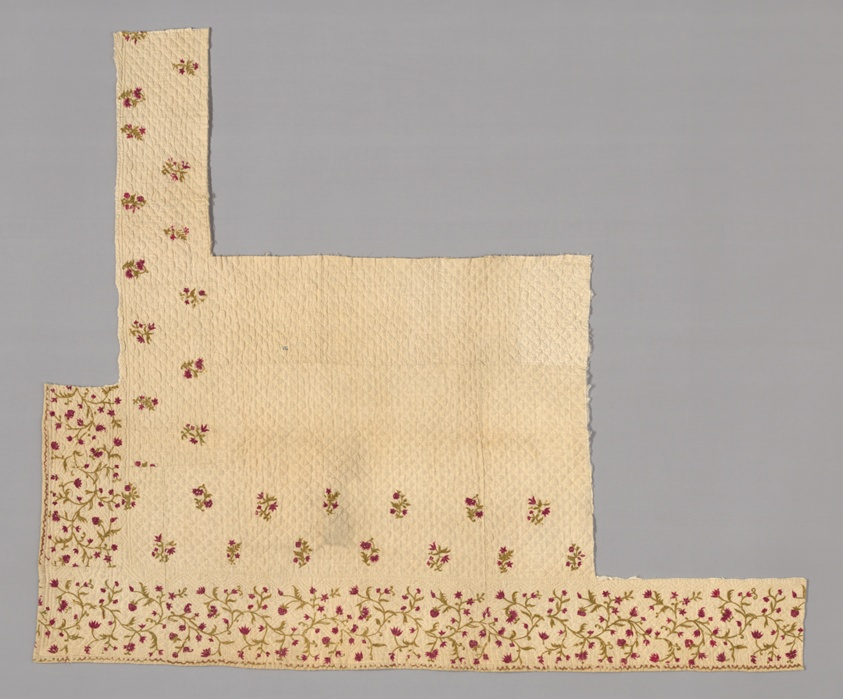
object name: Textile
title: Fragments from a Bedcover made of Petticoat Borders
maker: France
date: Late 18th century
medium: Cotton, plain weave; embroidered with wool threads in chain stitch; quilted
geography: France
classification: textile; needlework (visual works); weaving